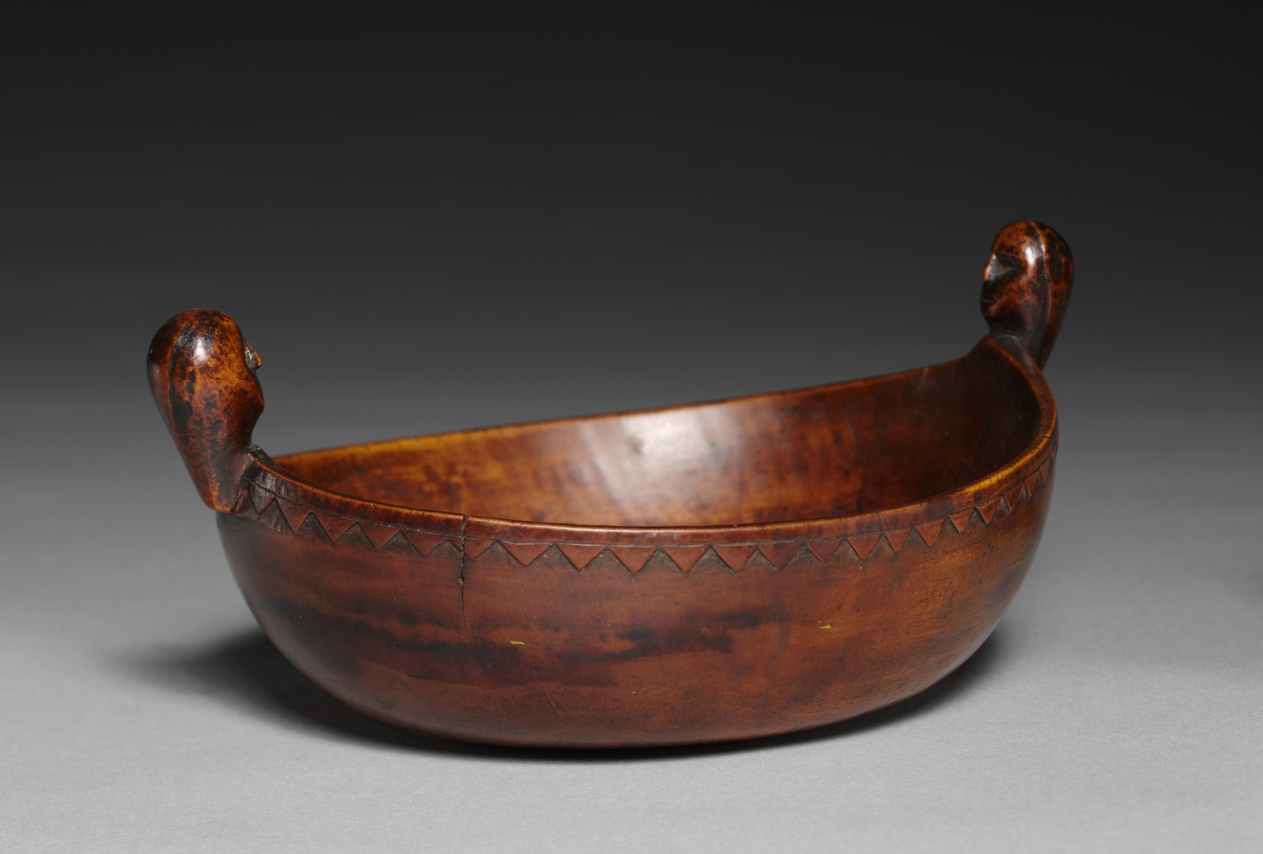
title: Bowl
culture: Native North America, Northeastern Woodlands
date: early 1800s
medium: wood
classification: Wood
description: Fine wooden bowls were often used during feasts in the Northeastern Woodlands. The heads on the rims may represent spirit beings, perhaps the owner’s guardian spirits, acquired through dreams or visions—thought to be the ultimate sources of truth. The medium may also be profoundly meaningful. A Great Lakes (Meskwaki) Native said in 1911, “The murmur of the trees when the wind passes through is but the voices of our grandparents. Often a whole forest hums with talk . . . we often hear the sound of their laughter and the sound of their lamentations.”